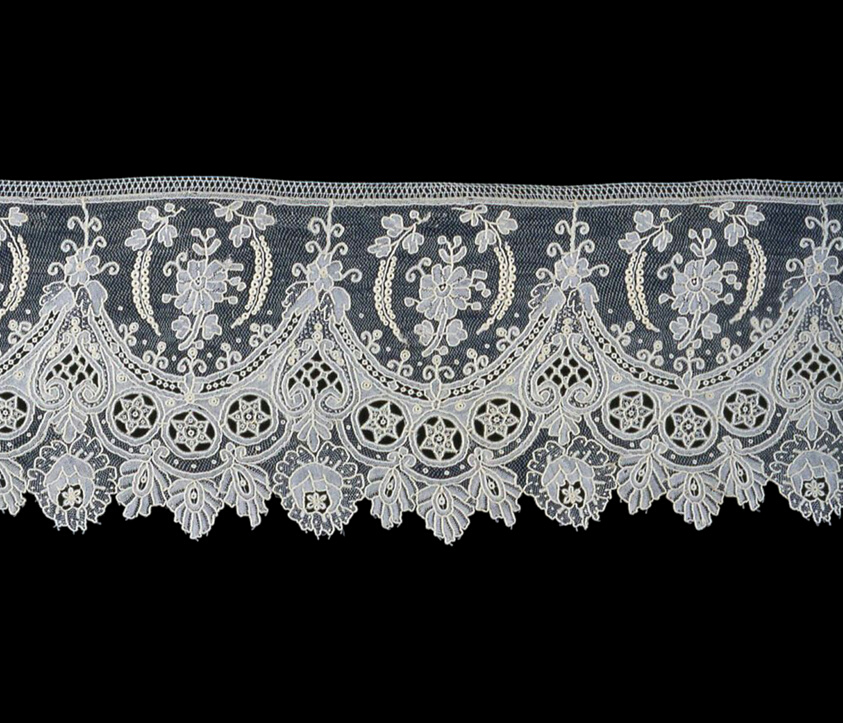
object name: Textile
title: Border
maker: Belgium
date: 1860/80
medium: Cotton, needle lace of a type known as "Point de Gaze"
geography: Belgium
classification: textile; lace - needle